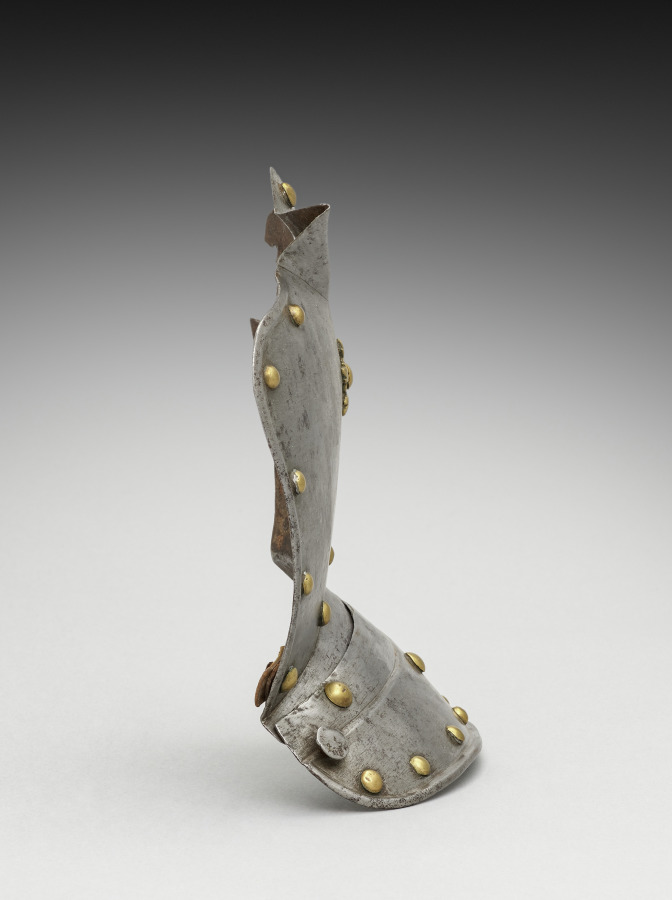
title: Ear Piece of a Helmet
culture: Germany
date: 1500s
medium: steel, brass headed rivets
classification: Arms and Armor